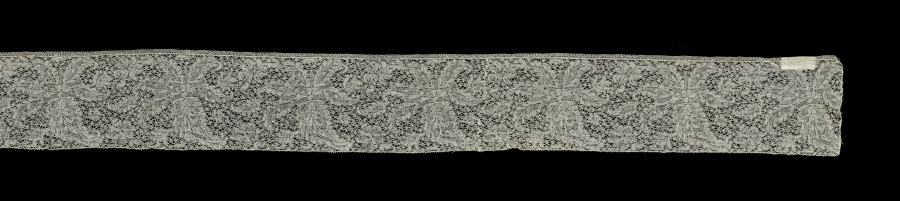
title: Lace Edging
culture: Belgium, Binche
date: 1600s–1700s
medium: Bobbin lace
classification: Lace